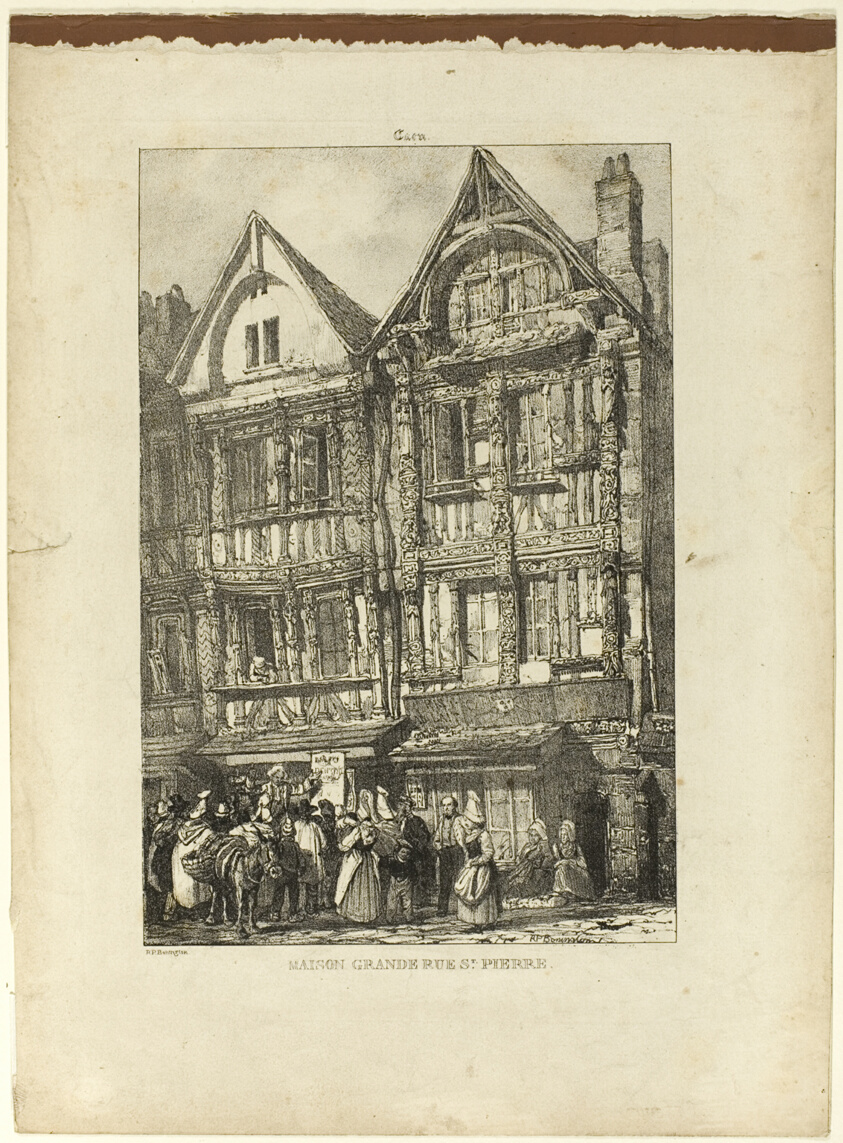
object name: Print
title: Maison Grande, Rue St. Pierre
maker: Richard Parkes Bonington (English, 1802-1828)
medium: Lithograph on paper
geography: England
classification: lithograph; print; prints and drawing